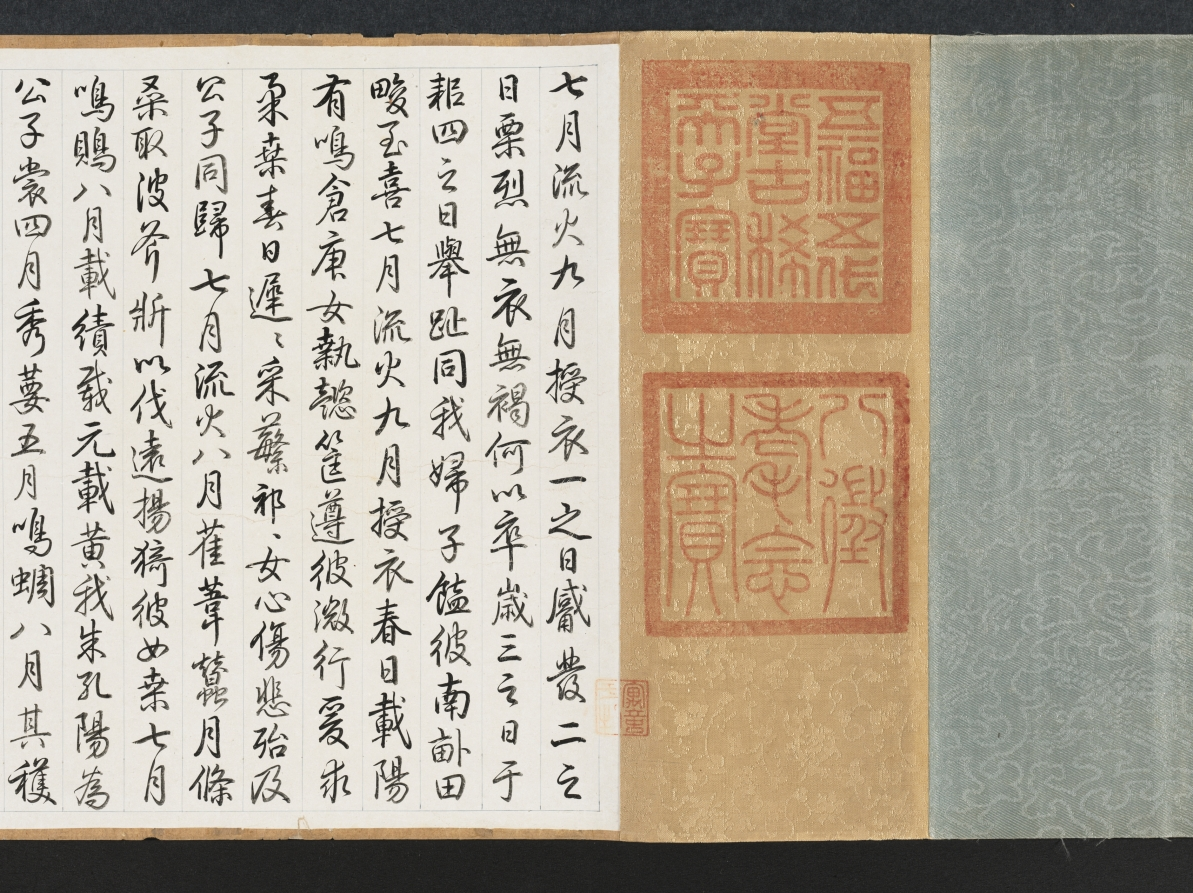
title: "Seventh Month" from the Odes of Bin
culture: China, Southern Song dynasty (1127-1279)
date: 1200s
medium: Handscroll; ink and color on silk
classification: Painting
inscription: Colophons: 1. [on the frontispiece] by the Qianlong emperor (dated 1741). 2. by Lu Wan (dated Zhengde dingchou, 1517). 2. by the Jiaqing emperor (dated 1807).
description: According to Confucian thought, the ruler looks after the well-being of his people which involves agricultural activities. Seventh Month from the ancient Odes of Bin in the Shijing (Book of Poetry) describes occupations throughout the year, including plowing, harvesting, hunting, making clothes, and observing rituals. The earliest illustrations of these Odes accompanied by text were commissioned by Southern Song emperor Gaozong (reigned 1127–1162). As the lower Yangzi delta had become the new seat of government, Gaozong had sets of these illustrations produced by court artists to revive the dynasty and convince the Confucian officialelite of his legitimacy to rule.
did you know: The Odes of Bin appears in the classic Shijing (Book of Poetry), an anthology of more than 300 poems, folk songs, and ceremonial hymns that were originally chanted to music.